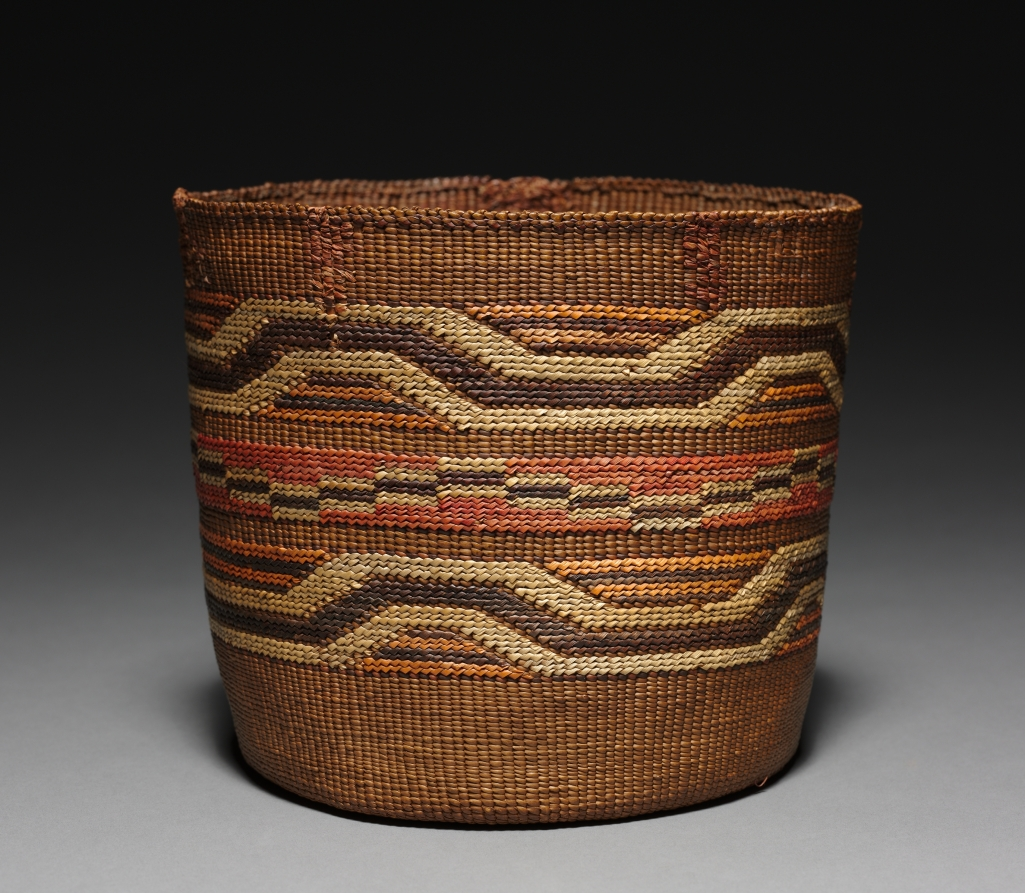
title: Bowl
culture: Northwest Coast, Tlingit, Unassigned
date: Unassigned, before 1917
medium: twined, imbricated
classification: Basketry